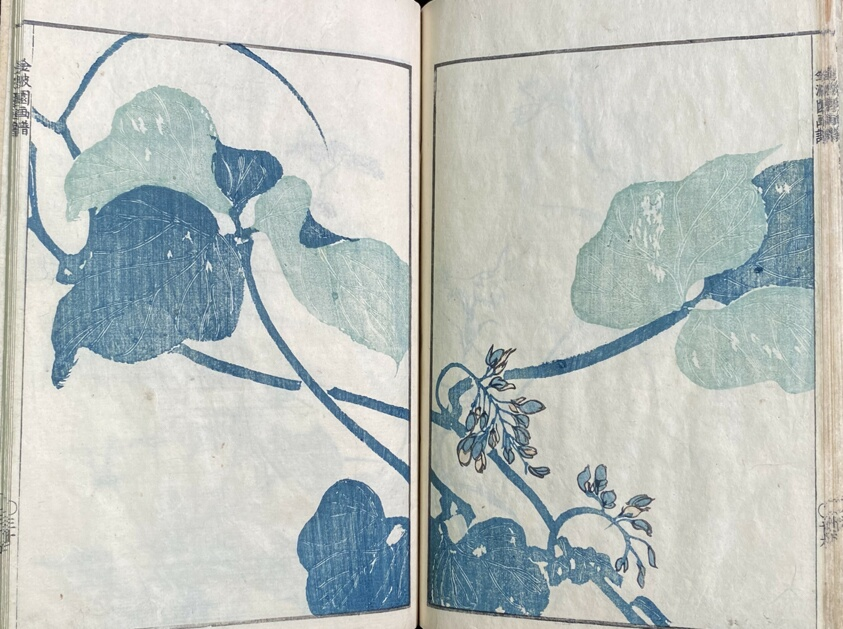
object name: Book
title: Kinpaengafu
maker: Kawamura Bumpo (Japanese, 1779-1821)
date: 1820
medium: Woodblock- printed book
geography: Japan